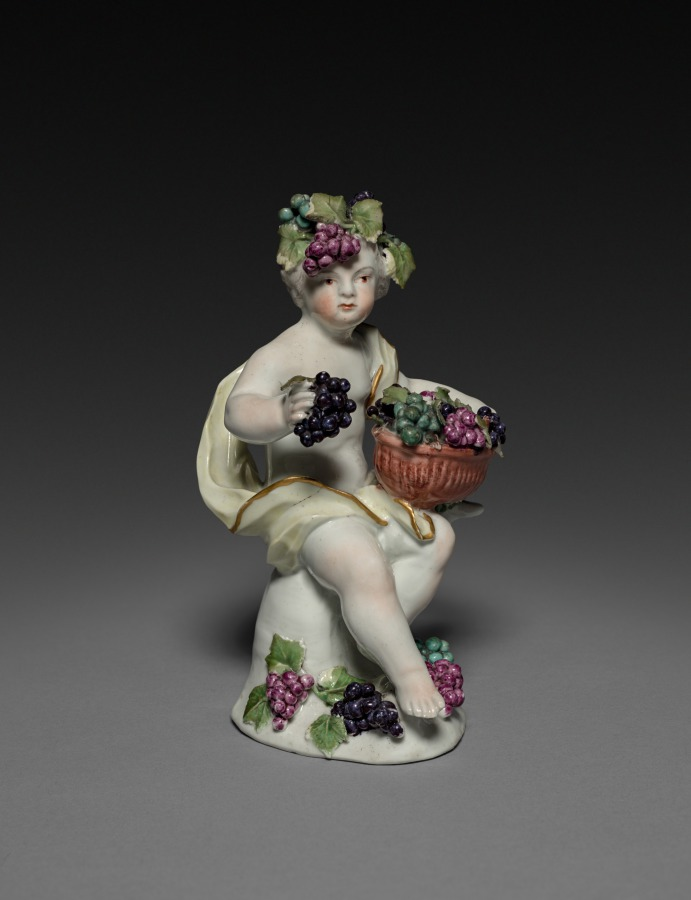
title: Autumn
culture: England, Derby, 18th century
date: c. 1760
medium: soft-paste porcelain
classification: Ceramic